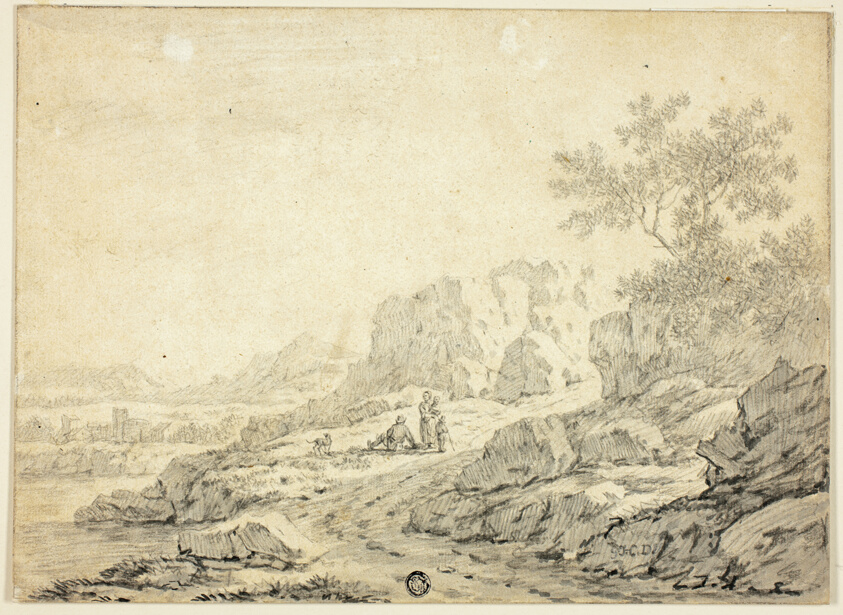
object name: Drawing and Watercolor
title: Rocky Landscape with Figures and Dog on Path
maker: Attributed to Georg Friedrich Dietzsch (German, 1717-1755); or Karel Dujardin (Dutch, c. 1622-1678); or Jacob Cats (Dutch, 1741-1799); or Johann Christophe Dietzsch (German, 1710-1769)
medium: Black chalk with brush and black and gray wash and traces of graphite on cream laid paper, laid down onto ivory laid card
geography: Germany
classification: chalk; drawings (visual works); prints and drawing